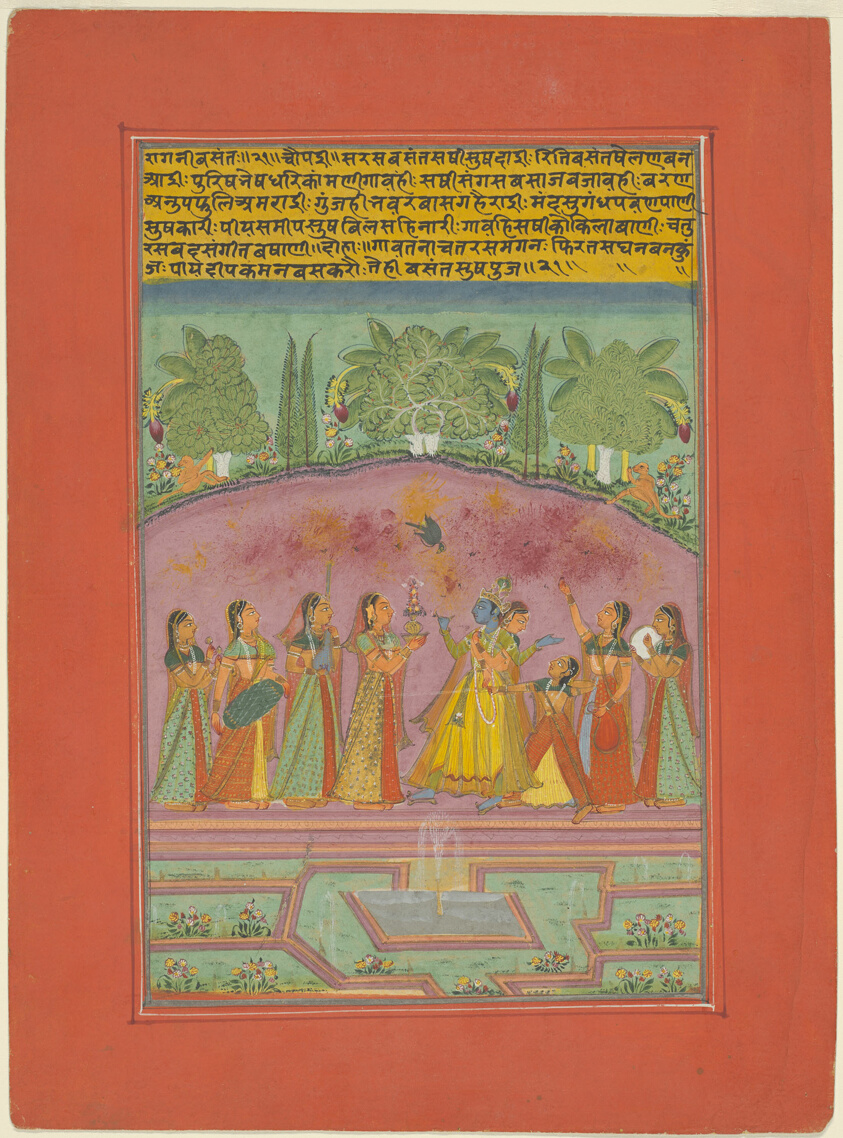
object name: Painting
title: Ragini Vasanta, Page from a Jaipur Ragamala Set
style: South Asian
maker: India; Rajasthan, Jaipur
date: c. 1750-1770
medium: Opaque watercolor on paper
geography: India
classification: miniature painting; painting; asian art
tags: music, musicians